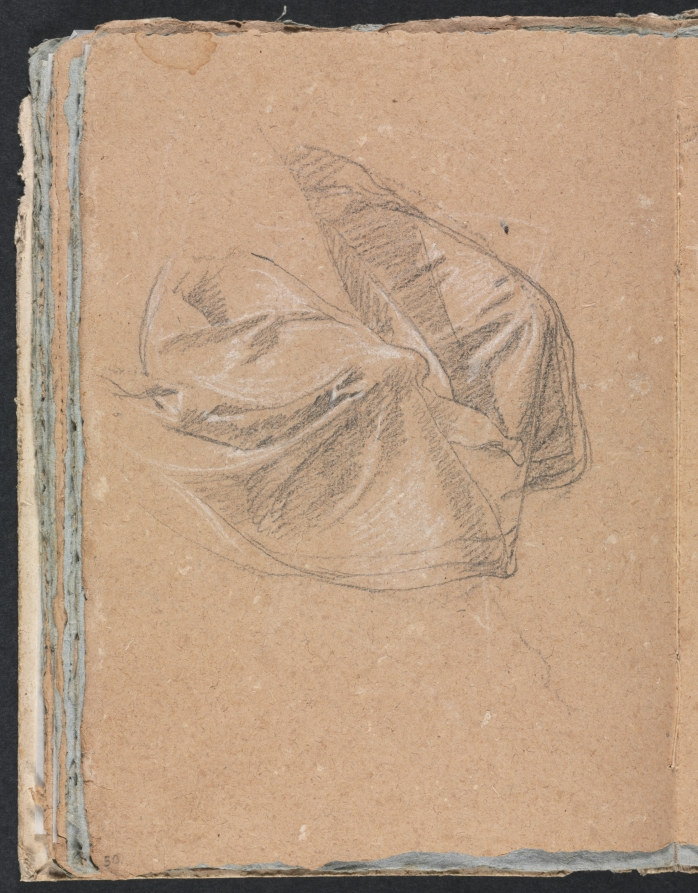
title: Verona Sketchbook: Drapery study (page 50)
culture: Italy, 18th century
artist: Francesco Lorenzi (Italian, 1723–1787)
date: 1760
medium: black chalk with white heightening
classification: Bound Volume